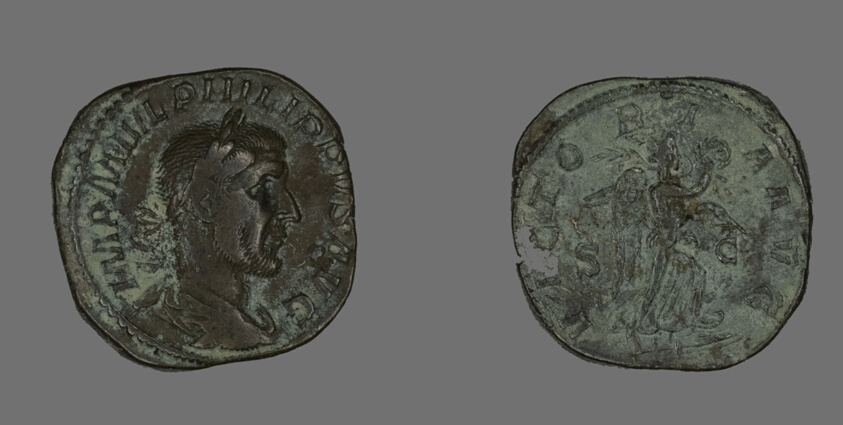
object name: Coin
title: Sestertius (Coin) Portraying Philip the Arab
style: roman (ancient, style or period), ancient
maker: Roman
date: 244-247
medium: Bronze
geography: Roman Empire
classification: coin; ancient art